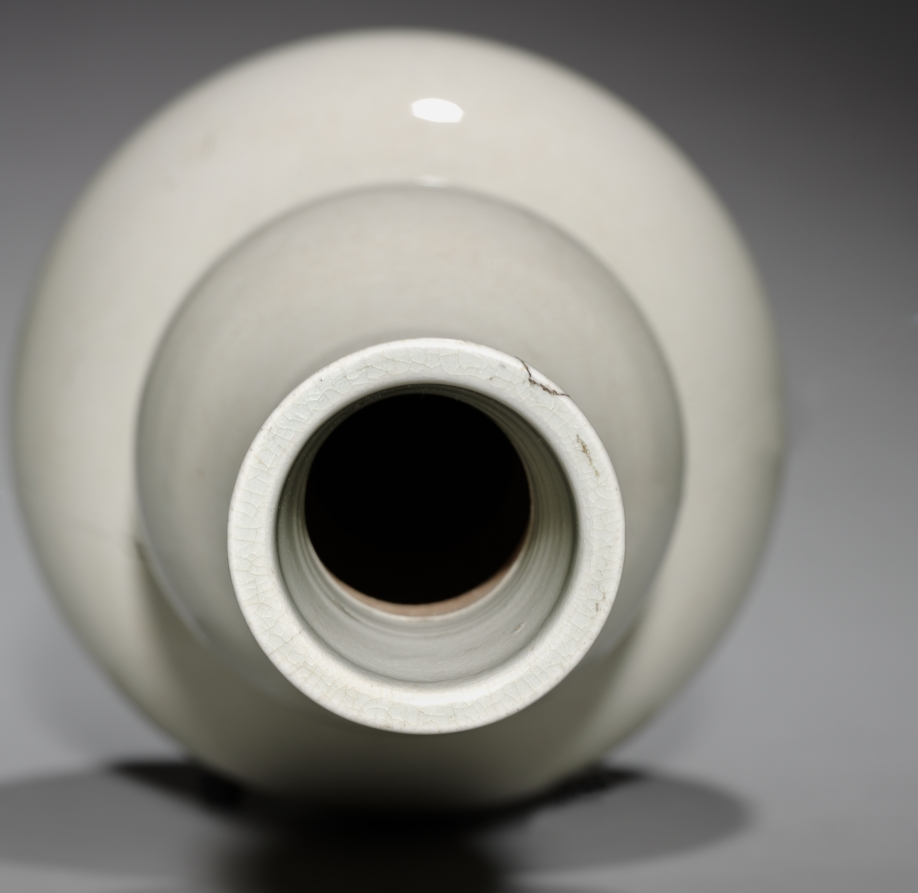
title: Double Gourd-shaped Bottle: Ding ware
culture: China, Ming dynasty (1368–1644)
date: 1368–1644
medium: porcelain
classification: Ceramic